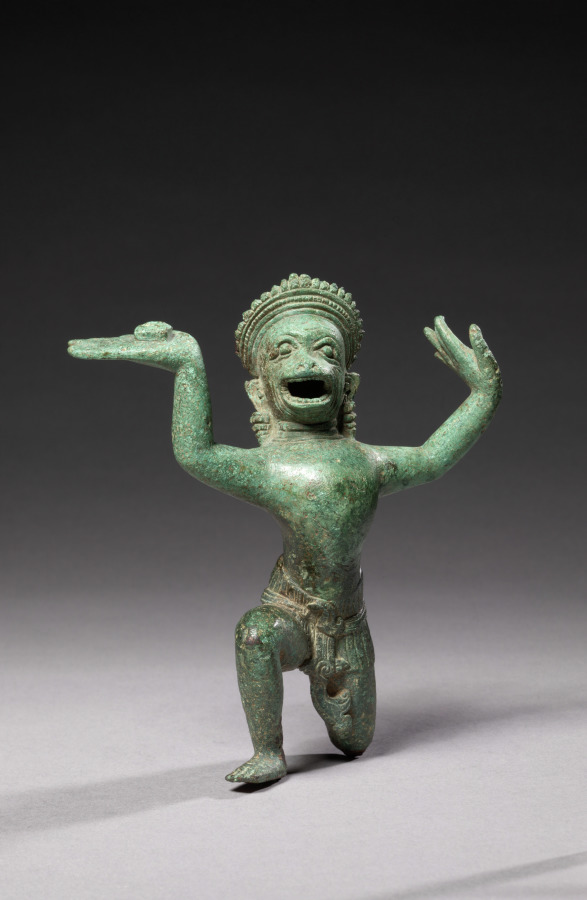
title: Flying Hanuman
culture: Cambodia, Koh Ker style, 10th century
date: 900s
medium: bronze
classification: Sculpture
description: Hanuman is most prominently featured in the Indian epic Ramayana, which had gained popularity in Cambodia by the 600s. In a dramatic scene from the epic, Hanuman, who is able to fly, raises his left hand in a gesture meaning "Fear not!" In his raised right hand he carries an antidote to a poison that has rendered the hero Rama and his brother paralyzed and dying. This antidote from the Himalaya Mountains will restore them to full vigor so that they will be able to win the war against the demons and rescue Rama's wife Sita. The garment's wide parallel pleat lines, the swinging flared swath between his legs, the tiered conical crown, and the broad volumes of the chest are stylistic hallmarks of Khmer art of the tenth century.